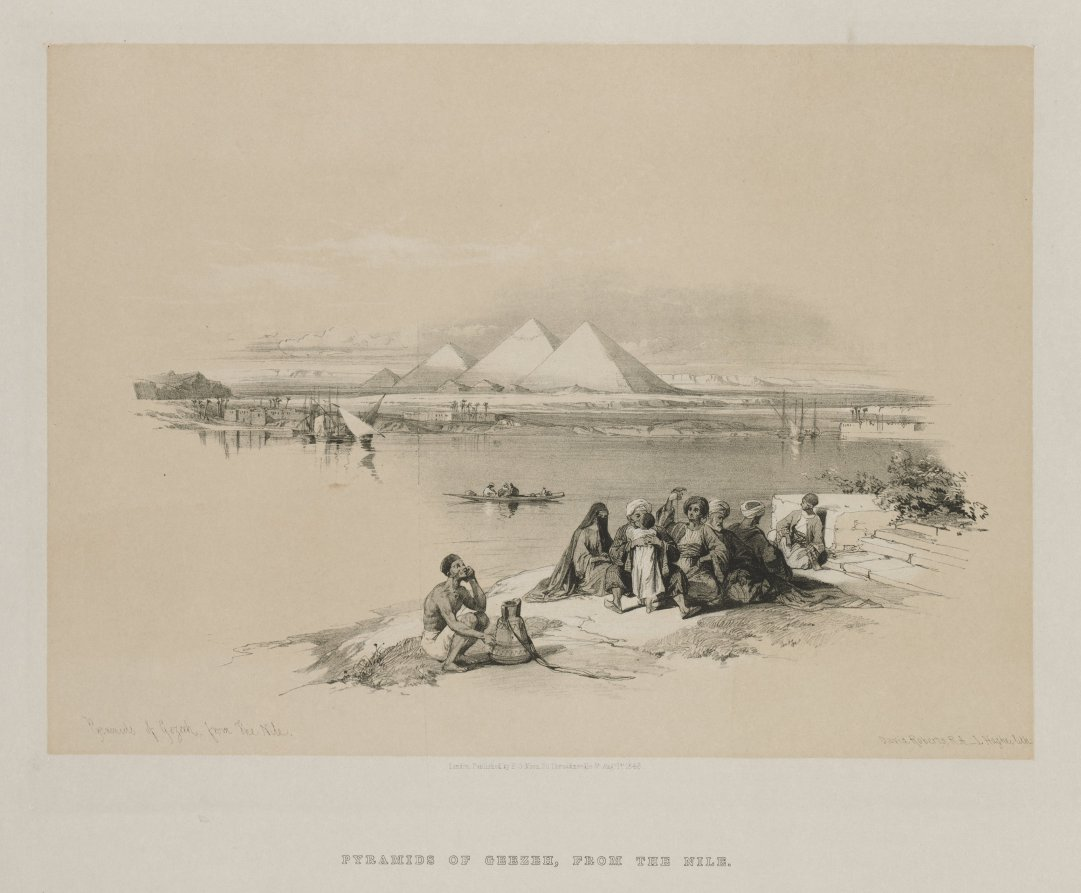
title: Egypt and Nubia, Volume I: Pyramids of Geezeh, from the Nile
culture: England, 19th century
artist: Louis Haghe (British, 1806–1885)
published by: F. G. Moon, 20 Threadneedle Street, London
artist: after David Roberts (Scottish, 1796–1864)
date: 1846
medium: color lithograph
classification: Print